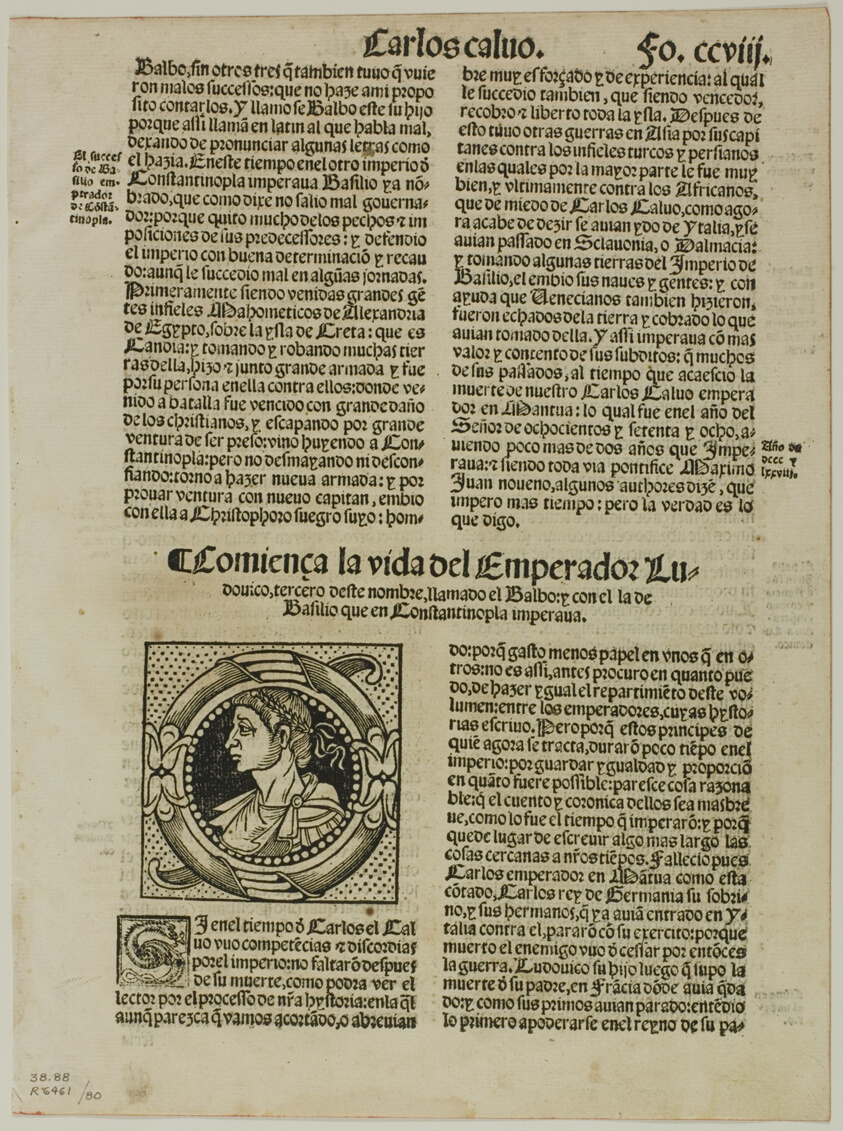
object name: Print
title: Leaf from Hystoria Imperial by Pedro Mexía, plate 80 from Woodcuts from Books of the XVI Century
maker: Unknown Artist (Spanish, 16th century); assembled by Max Geisberg (Swiss, 1875-1943)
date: 1564, assembled into portfolio 1937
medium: Woodcut on paper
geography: Spain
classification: woodcut; print; prints and drawing